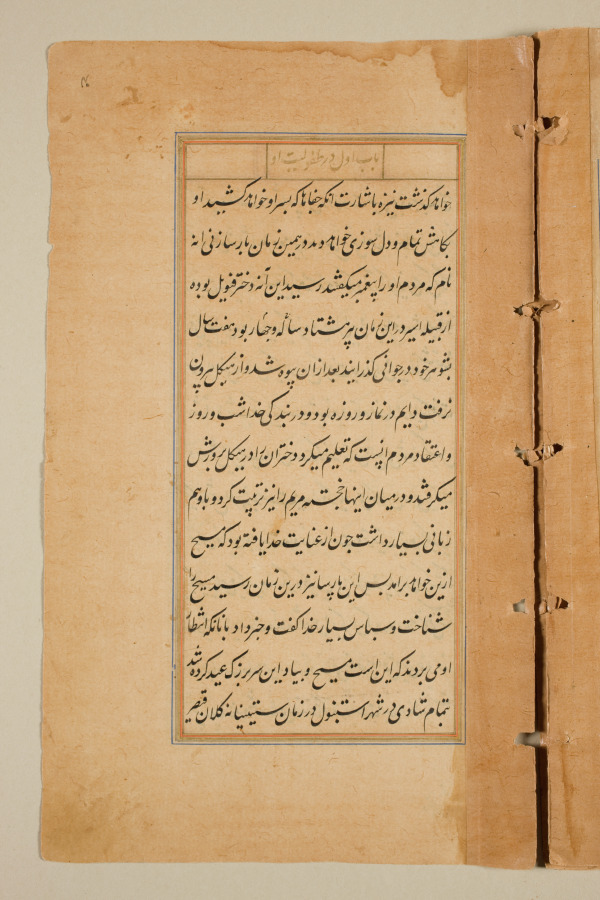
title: Text page from a Mirror of Holiness (Mir’at al-quds) of Father Jerome Xavier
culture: Mughal India, Allahabad, made for Prince Salim (1569–1627)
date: 1602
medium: Ink and gold on paper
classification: Manuscript